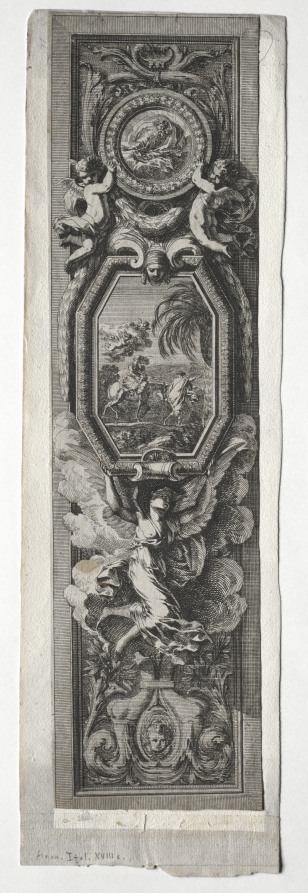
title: Panel with Vignette of Flight into Egypt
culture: Italy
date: c. 1700s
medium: etching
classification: Print